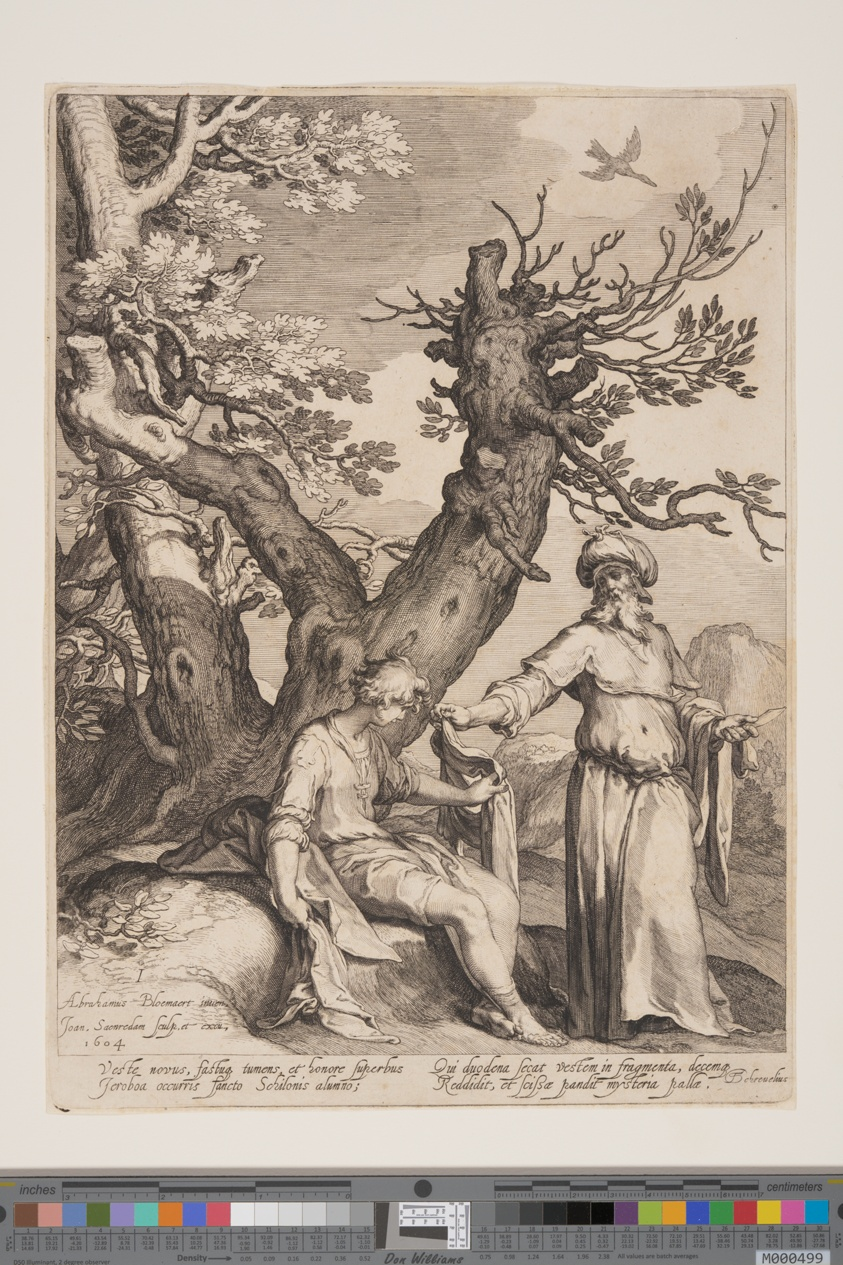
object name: Print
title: Ahajah Divides his Cloak into Twelve Parts, from Four Scenes from the Life of the Prophets, Isaiah, Ahajah and Elisha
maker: Jan Saenredam (Dutch, 1565–1607); after Abraham Bloemaert (Dutch, 1566–1651)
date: 1604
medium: Engraving on ivory laid paper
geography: Netherlands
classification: print; paper; prints and drawing; engraving